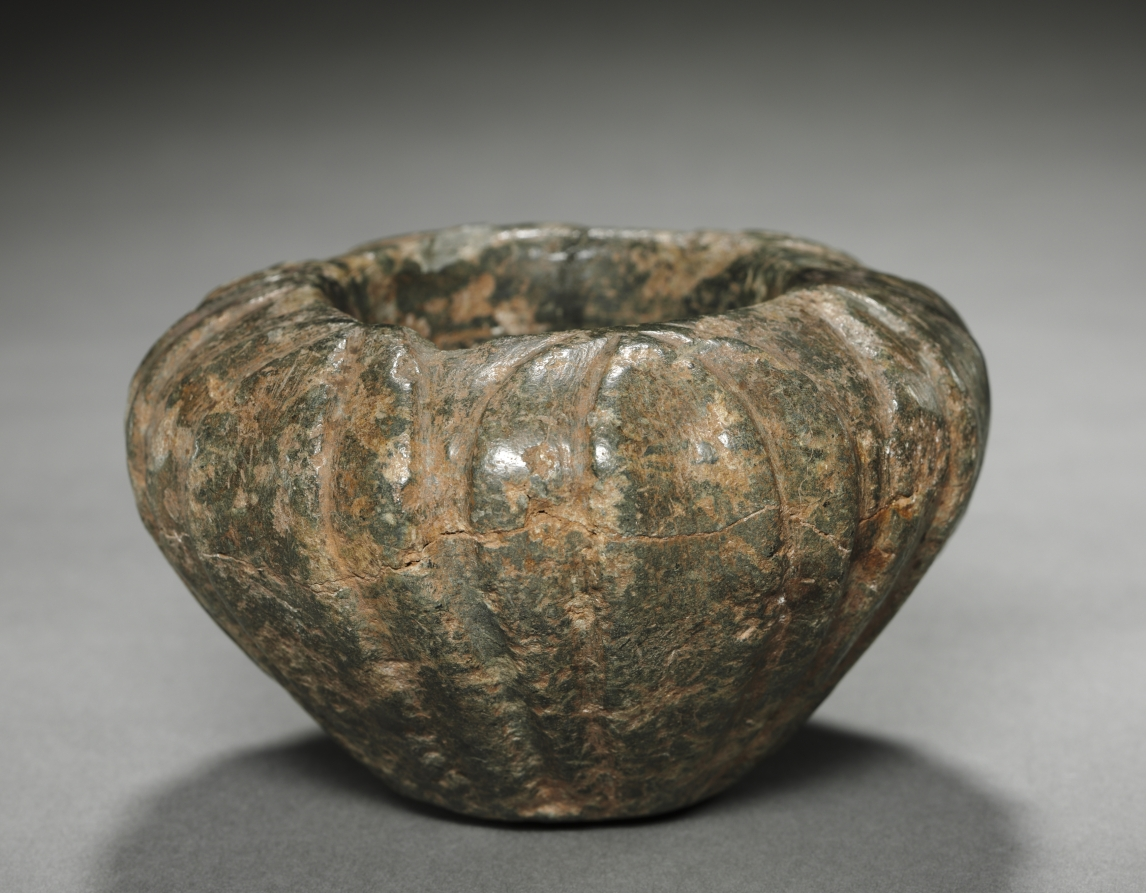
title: Minoan Petal Bowl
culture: Crete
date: 1600–1500 BCE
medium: stone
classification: Stone